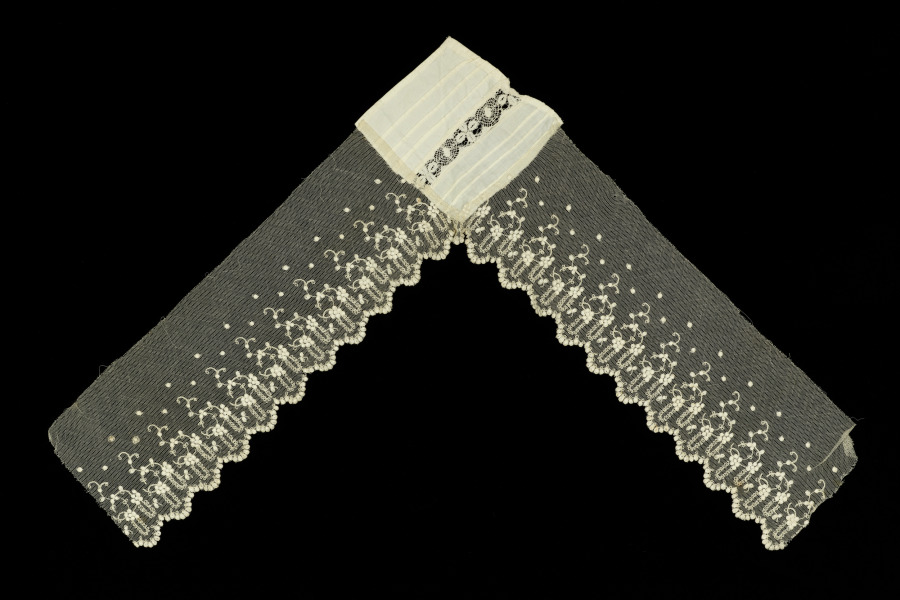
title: Woman's Costume (Machine-Made Lace for Neck)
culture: Italy, Sicily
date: 1800s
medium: Machine-made net lace, embroidered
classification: Garment